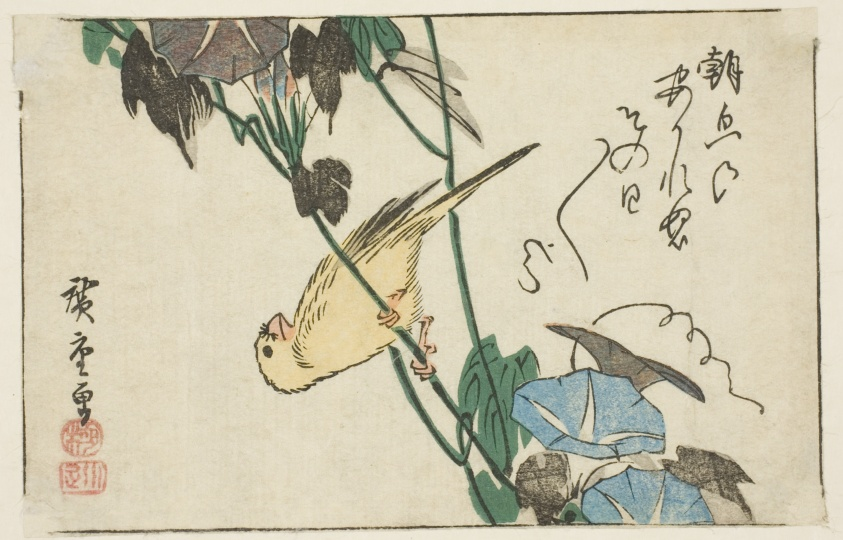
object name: Print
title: Canary and morning glories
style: Japanese (culture or style)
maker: Utagawa Hiroshige 歌川 広重; Japanese, 1797-1858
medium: Color woodblock print; yotsugiriban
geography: Japan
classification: woodblock print; print; asian art